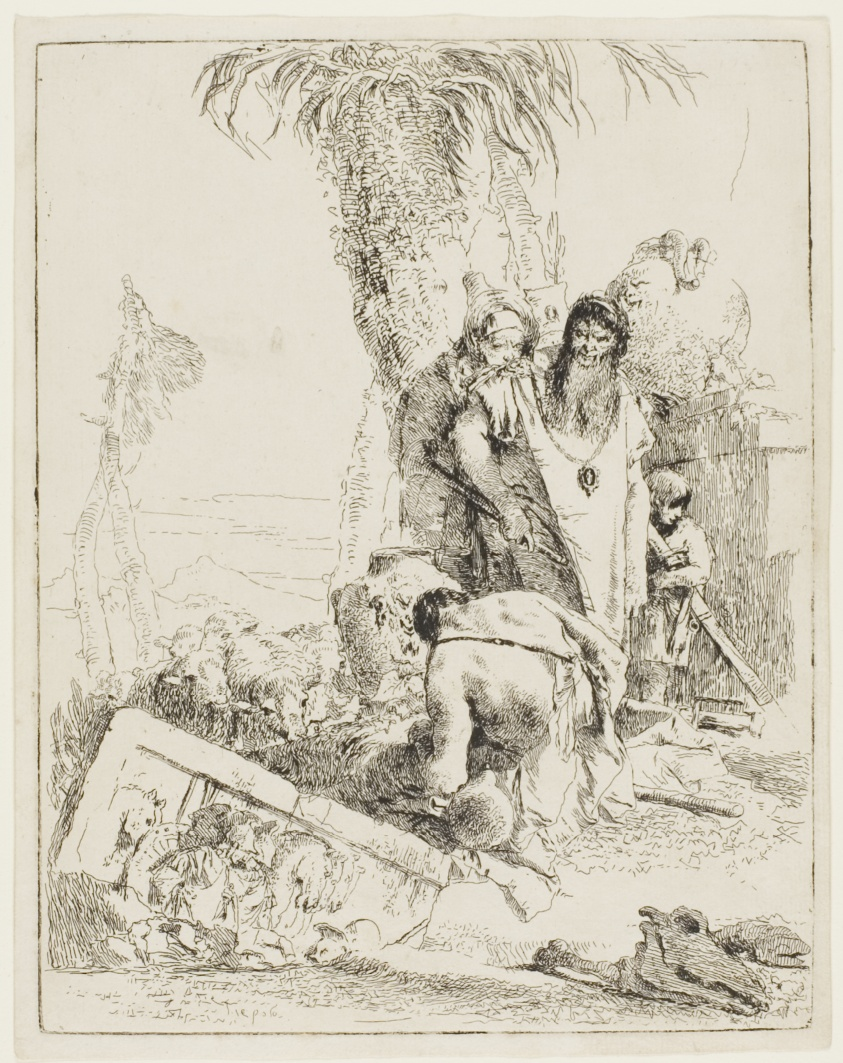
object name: Print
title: A Shepherd with Two Magicians, from Scherzi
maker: Giovanni Battista Tiepolo (Italian, 1696–1770)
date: 1735–40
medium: Etching on paper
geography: Italy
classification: etching; print; prints and drawing